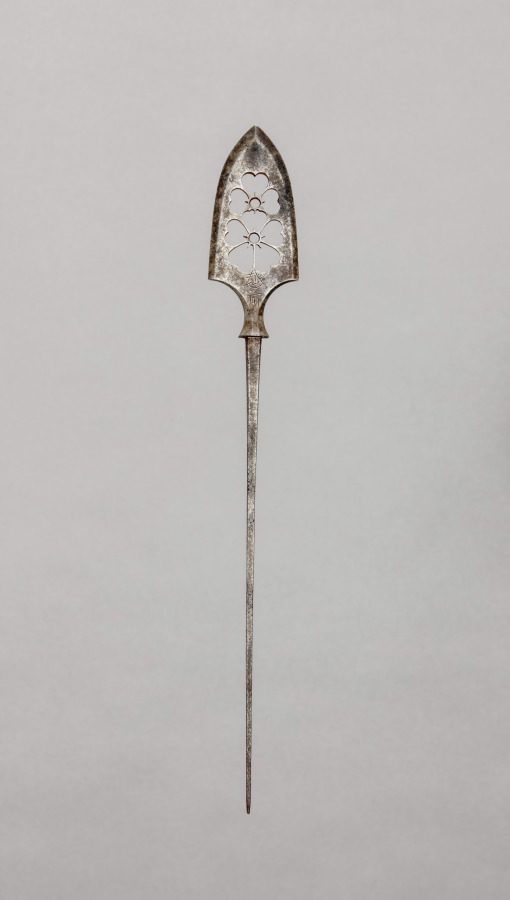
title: Arrow Point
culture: Japan, Edo period (1615–1868)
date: 1700s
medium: steel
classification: Arms and Armor